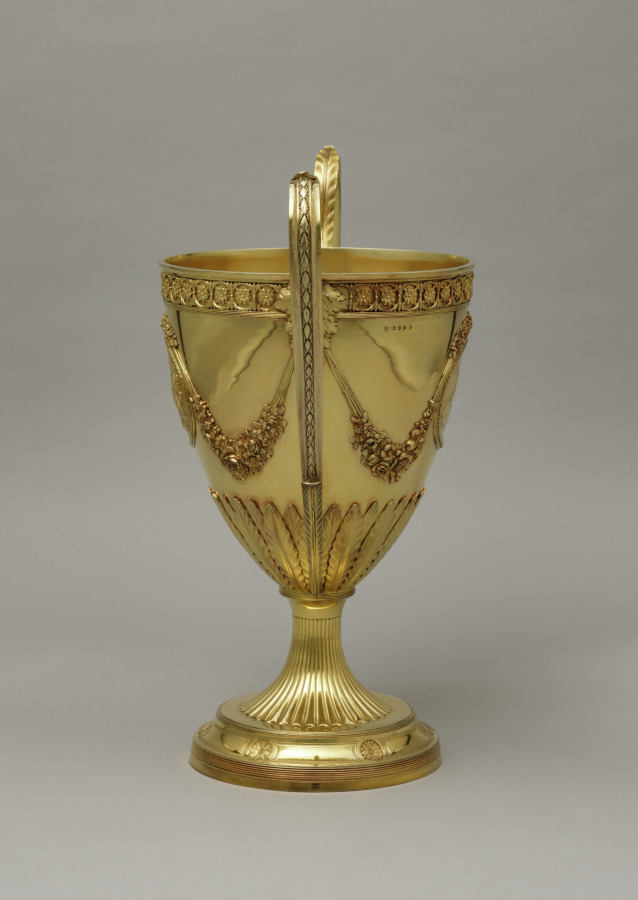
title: Trophy Cup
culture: England, 18th century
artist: Peter Bateman (British, 1740–1825)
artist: Anne Bateman (British, 1748–1813)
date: 1792–93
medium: silver gilt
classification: Silver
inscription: Engraved arms: Grosvenor impaling Egerton and Grey (arms of Robert Grosvenor (1767–1845), the first Marquess of Westminster, and Lady Eleanor Egerton (1770–1846))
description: Silver fulfilled a prominent role in projecting wealth, status, power, and ritual in British life during the 1600s and 1700s. Elaborate forms such as this trophy, with its swags of flowers, neoclassical rosettes, and acanthus spears, not only represented wealth in its sheer silver weight but also provided royal and aristocratic owners a surface for displaying engraved coats of arms. Engraved on one side of this trophy cup can be found the arms of Robert Grosvenor (1767–1845), the first Marquess of Westminster, and Lady Eleanor Egerton (1770–1846), whom he married in 1794, a year after the trophy’s completion. The other side depicts preparations for a horserace, the most culturally significant leisure activity enjoyed by aristocratic families in the 1700s. Grosvenor owned a number of famous horses and was likely awarded this trophy following a successful race.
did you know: This trophy cup has a lid. See cover record.